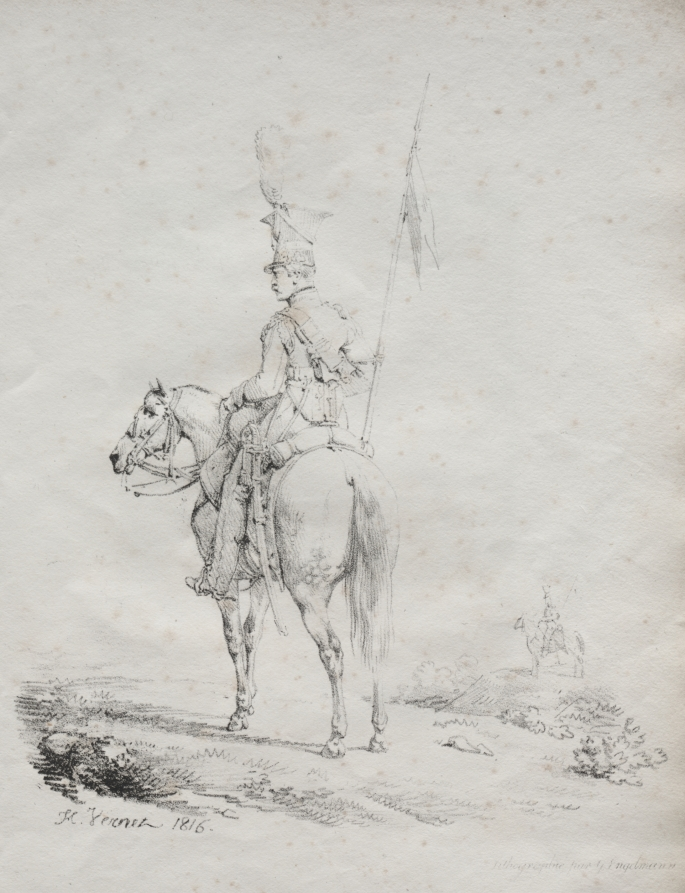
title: Receuil d'essais lithographiques: Le Lancier en Vedette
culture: France, 19th century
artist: Horace Vernet (French, 1789–1863)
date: 1816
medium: lithograph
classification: Bound Volume